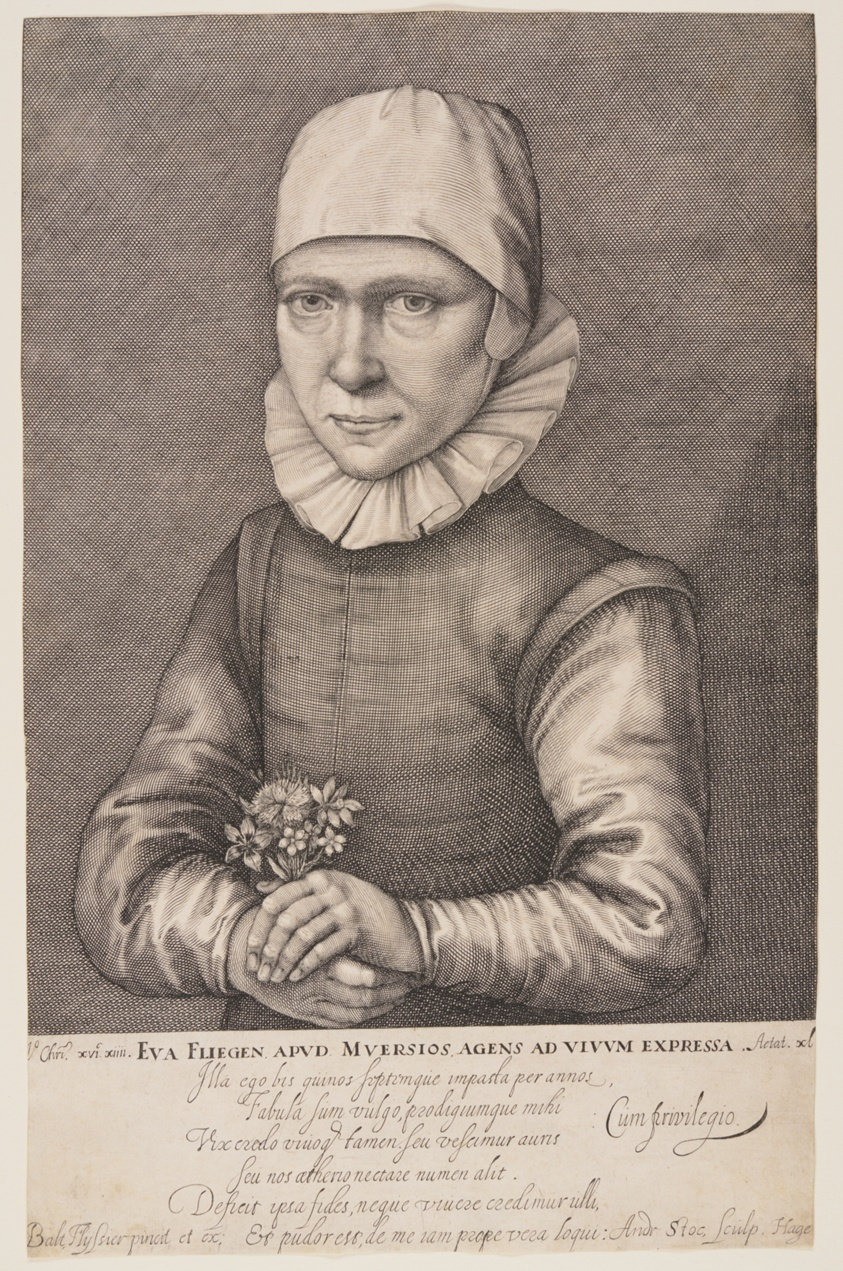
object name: Print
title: Eva Fliegen van Meurs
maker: Andries Jacobsz. Stock (Dutch, c. 1580–c. 1648); after Balthasar Flessiers (Dutch, c. 1550-c.1626)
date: 1614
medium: Engraving on ivory laid paper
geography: Netherlands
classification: print; paper; prints and drawing; engraving